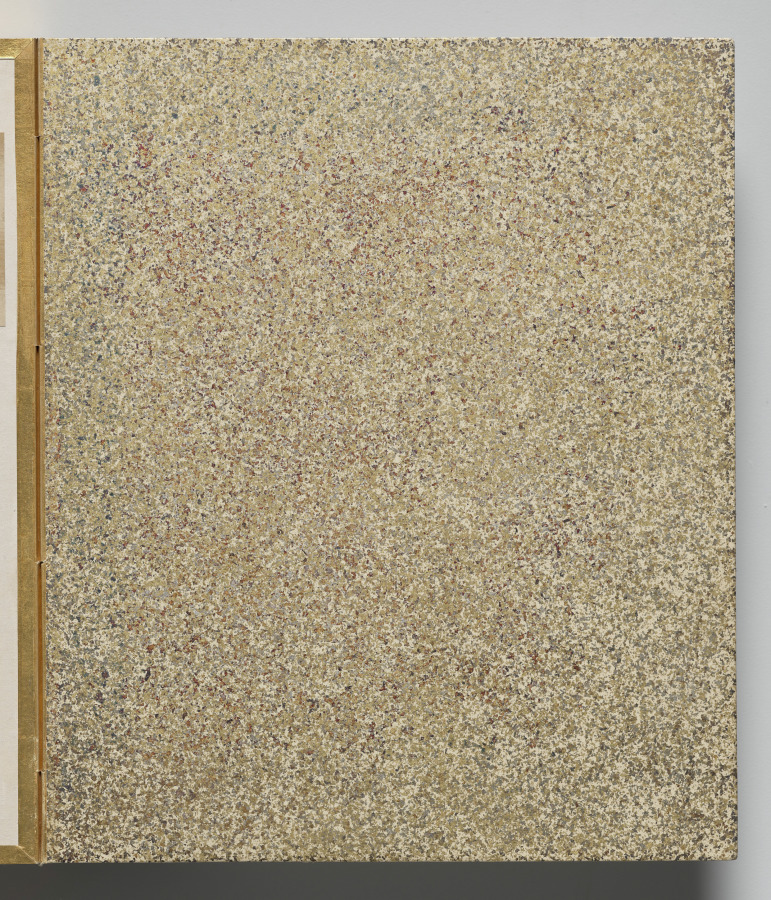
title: Album of Illustrations for the Tale of Genji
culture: Japan, Edo period (1615–1868)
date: 1600s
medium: Double-sided accordion-style album of 17 leaves; ink, light color, and gold on paper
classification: Bound Volume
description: This album contains illustrations for the classic literary work the Tale of Genji, authored in the 1000s by Murasaki Shikibu, an aristocrat of the Heian period (794–1185) court. The scenes are painted in the “white drawing” (hakubyō) mode, in which a fine ink line is used to depict figures and spaces with great subtlety, punctuated only occasionally by traces of red pigment for a character’s lips, a detail of a garment, or a decorative element. These two scenes illustrate episodes from the chapters “Thin Veil of Cloud” (Usugumo) and “Barrier Gate” (Sekiya).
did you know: The illustrations are identified by chapter title in cartouches to the upper right of the paintings.